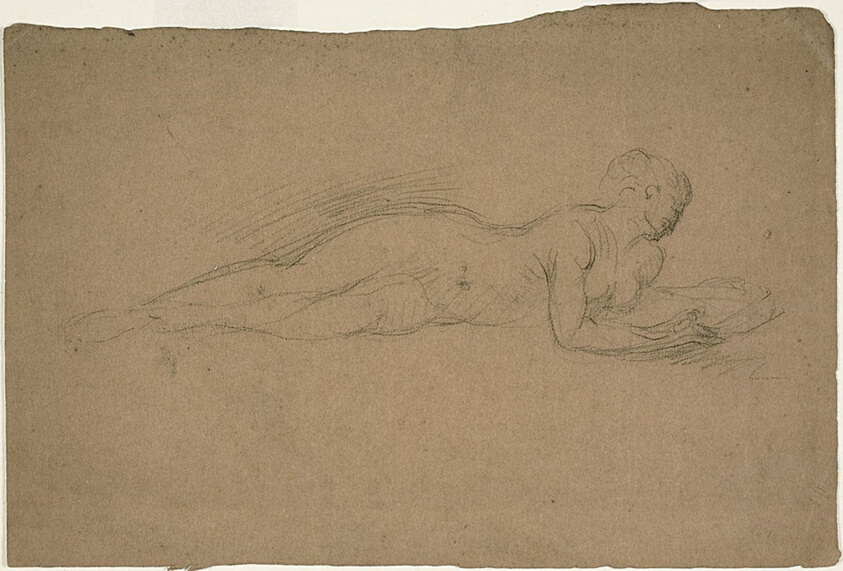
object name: Drawing and Watercolor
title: Reclining Woman with a Mirror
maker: Jean Baptiste Carpeaux (French, 1827-1875)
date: c. 1860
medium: Black chalk on tan wove paper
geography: France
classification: chalk; drawings (visual works); prints and drawing